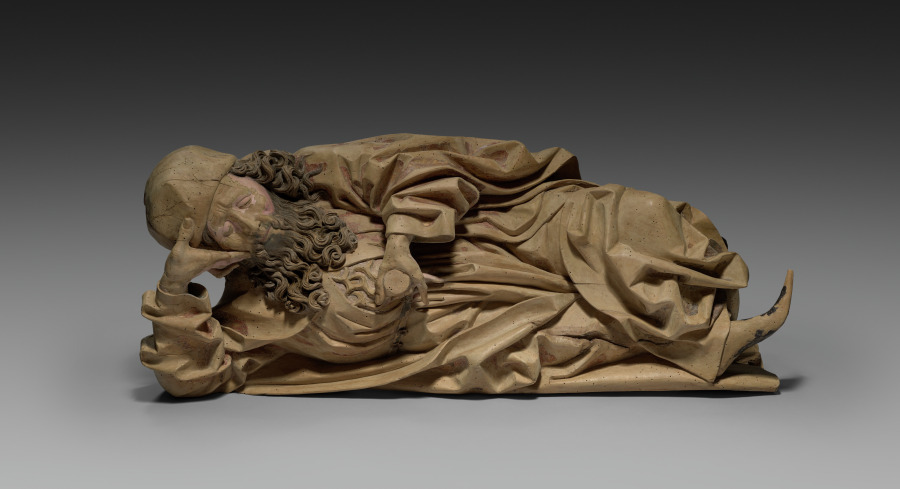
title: Jesse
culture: Germany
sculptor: Veit Stoss (German, c. 1445–1533)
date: c. 1500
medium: Limewood, polychromed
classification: Sculpture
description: The figure shows the sleeping Jesse, the father of David from the Old Testament. As the ancestor of the family tree of Christ, he was depicted in the Middle Ages sleeping as the starting point of the tree, on whose branches the ancestors of Christ are depicted. Mary with the Christ child is always shown at the top. The figure comes from a wooden altarpiece from an unknown church, possibly in Nuremberg, which is now lost. Veit Stoss is one of the most prominent German sculptors around 1500 who was mainly active in Nuremberg (Bavaria, Germany) and Krakow (Poland), also as a painter and engraver.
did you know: The family tree of Christ starts from Jesse, the father of David in the Old Testament.